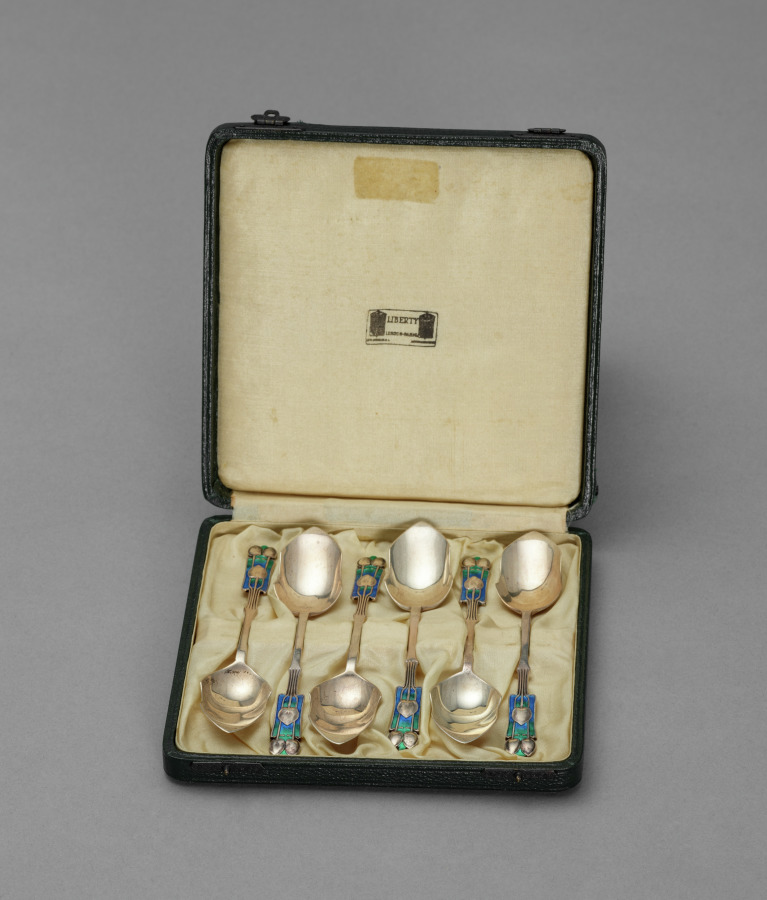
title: Set of six Spoons in Original Box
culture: England, London, 19th century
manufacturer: Liberty and Company (British)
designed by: attributed to Archibald Knox (British, 1864–1933)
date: c. 1895–1910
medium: Silver, enamel decoration and leather box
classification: Silver